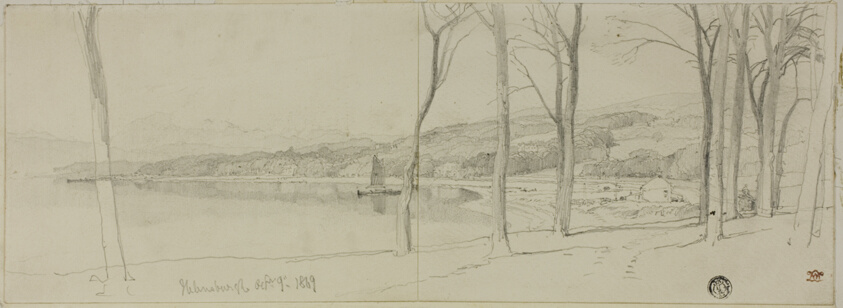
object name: Drawing and Watercolor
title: Helensburgh, Scotland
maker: William Leighton Leitch (Scottish, 1804-1883)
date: 1869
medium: Graphite, on cream wove paper, laid down on cream board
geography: Scotland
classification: graphite; drawings (visual works); prints and drawing